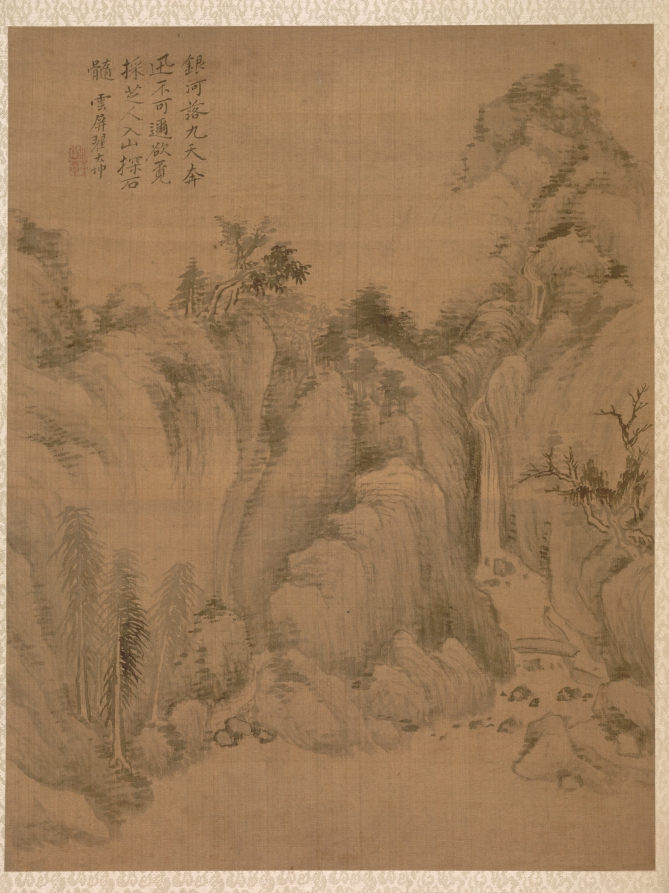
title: Landscape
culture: China, Qing dynasty (1644-1911)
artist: Zhai Dakun (Chinese, d. 1804)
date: 1775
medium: album leaf; ink and color on silk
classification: Painting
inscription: Waterfall and Rocks. The Milky Way descends from the ninth heaven, No matter how swift one is, one can't even come close to it. I would seek the man who gathers mushrooms, He has entered the mountains to search out the rocks' marrow. Yunping Zhai Dakun. Seals: 1) r/i "Dakun" 2) r/r "Zihou"